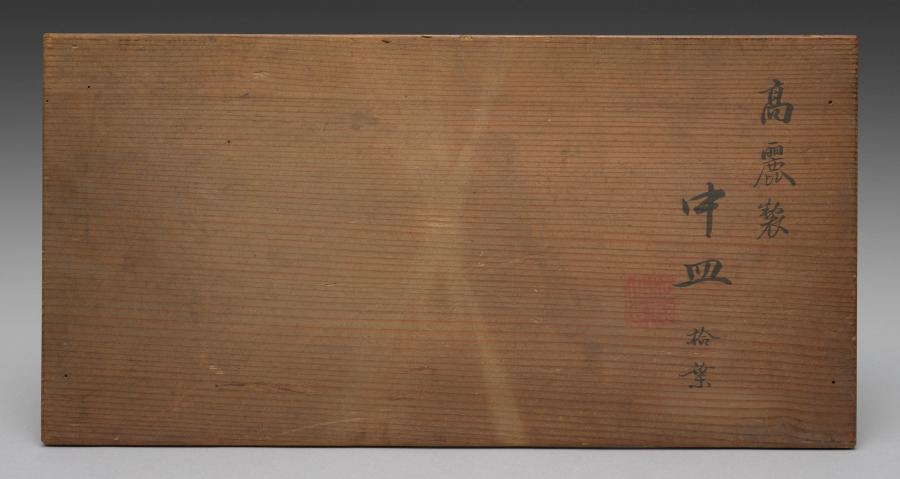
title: Dining Set with Plum Blossoms and Cracked-Ice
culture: Japan, Edo period (1615–1868) to Meiji period (1868–1912)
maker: Seifū Yohei II (Japanese, 1844–1878)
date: 1875–78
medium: Porcelain with molded designs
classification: Ceramic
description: Each item in this set has a delicate low-relief design of flowering plum branches over scattered, intersecting lines meant to resemble the cracked-ice surface of a frozen body of water and is signed on the base in gold pigment. While Yohei II produced many fine works in underglaze blue, like those produced by Kiyomizu Shichibei, he also made works in quite different styles later in his career, from the early 1870 s. In 1873, he was appointed purveyor to the Industrial Center of Kyoto Prefecture, a designation associated with Kyoto’s efforts to reach an international market through the port of Kobe; and from 1875 until his death, he was involved in national-level projects to present Japanese ceramics across the world. It was during this period that Yohei III was apprenticed to Yohei II, and it has been suggested that this set may in fact be an early example of Yohei III’s work, which he signed with his teacher’s name. Decorated with flowers resembling Japanese textile motifs, the set calls to mind the design of Yohei II’s pair of vases with plum blossoms in the Victoria and Albert Museum. Here, the elaborate trees created for a formal public exhibition setting have been translated into the approachable blossoms of the genteel domestic environment. While the designs are consistent across the pieces, each raised flower petal and pistil and each incised line in the ice was done by hand, so the cups, bowls, and dishes are similar yet unique. The bottoms of two boxes once identified the set’s owner, but the information has been deliberately obscured with black ink. However, inscriptions still visible appear to indicate two occasions, once at the end of July 1886 , and once again in June 1916 , when parts of the set were requested from Hokura in Niigata Prefecture. The location corresponds to a neighborhood in the present-day city of Jōetsu. The surname Tsuji 辻 also appears on a paper tag affixed to one of the box cloths. Future research may possibly reveal more about their provenance. A vase by Yohei III in a private collection combines the formal grandeur of the Yohei II vases in the Victoria and Albert Museum with the gentler design of this dining set, placing flowering plum trees against soft, scalloped-edge clouds resembling those in golden screens.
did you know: The dining wares have a creamy white coloration that the four boxes containing them identify as Korean in style.